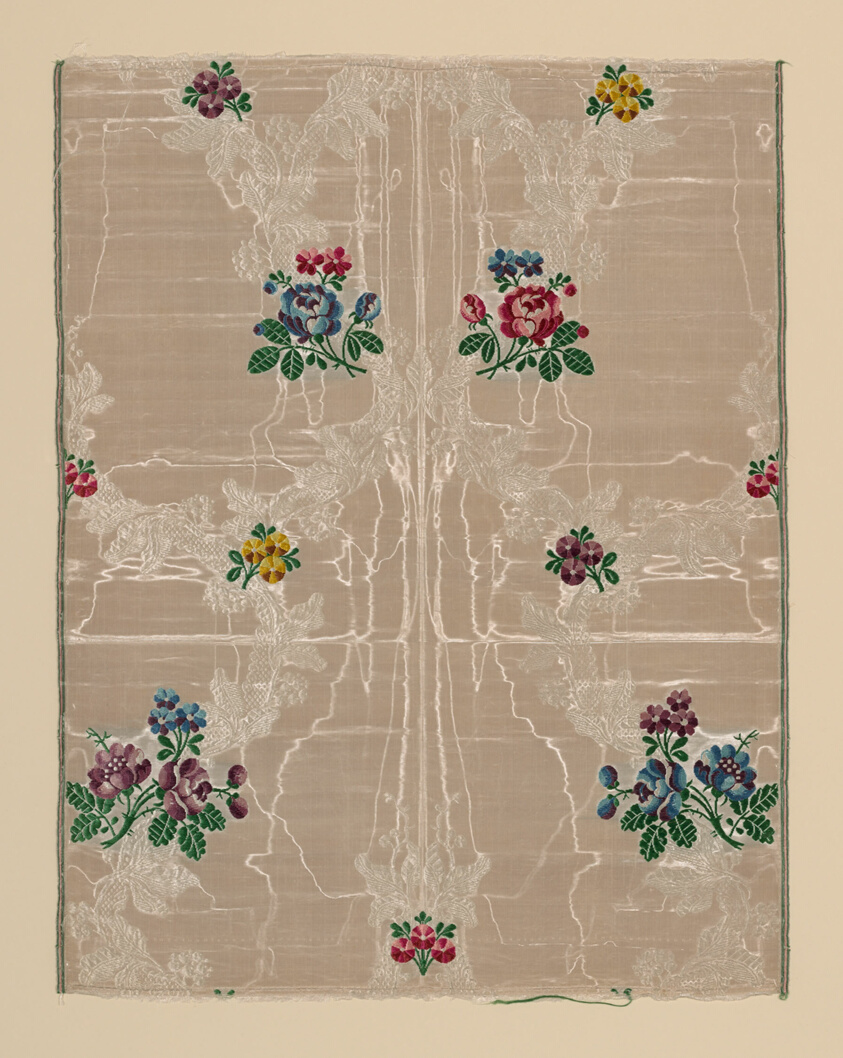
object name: Textile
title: Panel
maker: England, Spitalfields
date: 1752/55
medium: Silk, plain weave with supplementary brocading wefts and self-patterned by ground weft floats; watered (moiré)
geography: Spitalfields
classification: textile; weaving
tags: flowers, foliage